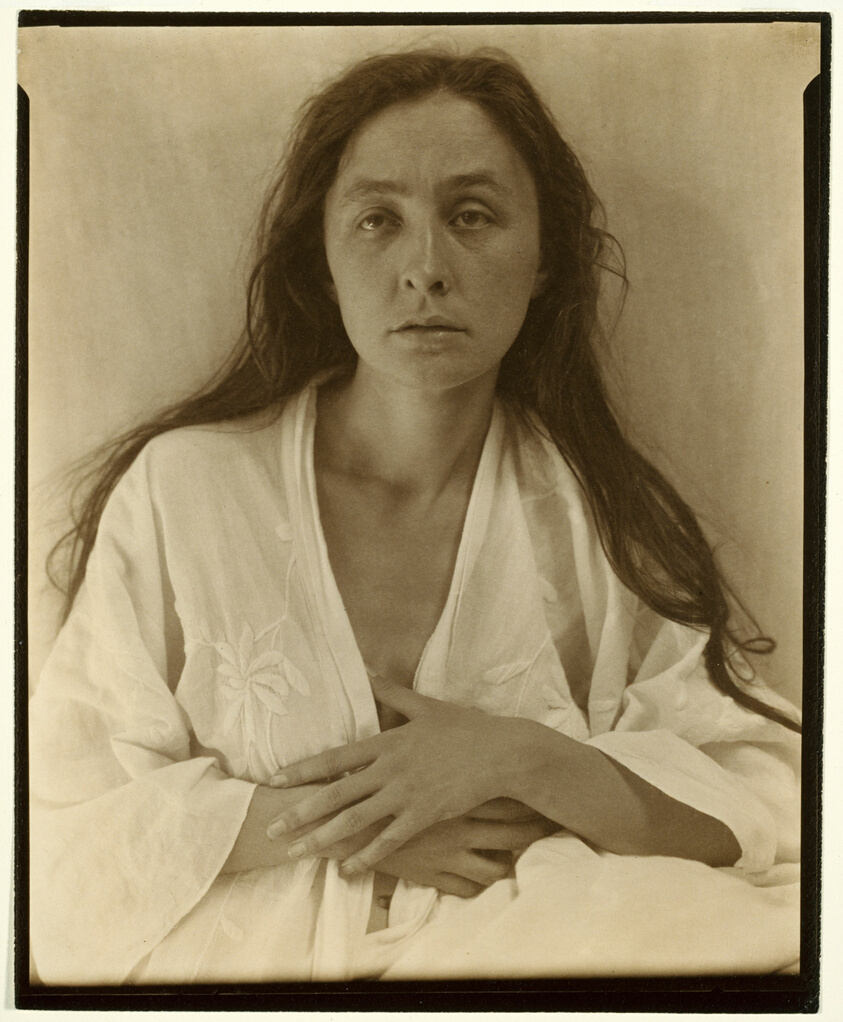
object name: Photograph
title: Georgia O'Keeffe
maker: Alfred Stieglitz (American, 1864–1946)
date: 1918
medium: Palladium print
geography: United States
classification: palladium print; photographic process; photography; photograph